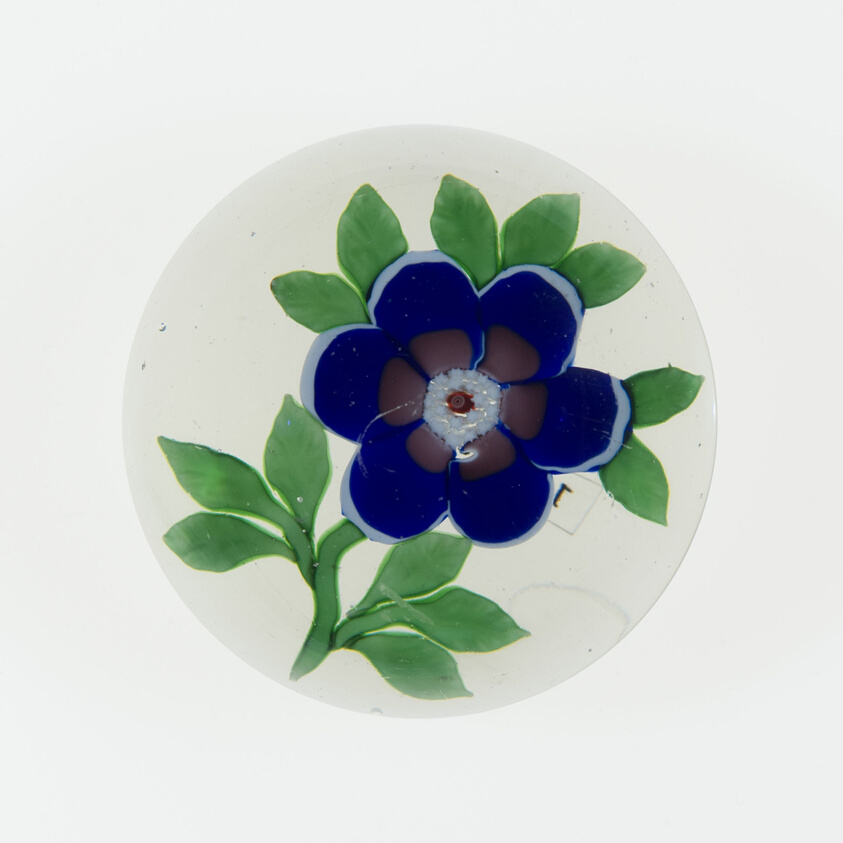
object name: Glass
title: Paperweight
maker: Baccarat Glassworks (Cristalleries de Baccarat); Lorraine, France, founded 1764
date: c. 1845–60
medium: Glass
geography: Baccarat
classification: paperweight; glass